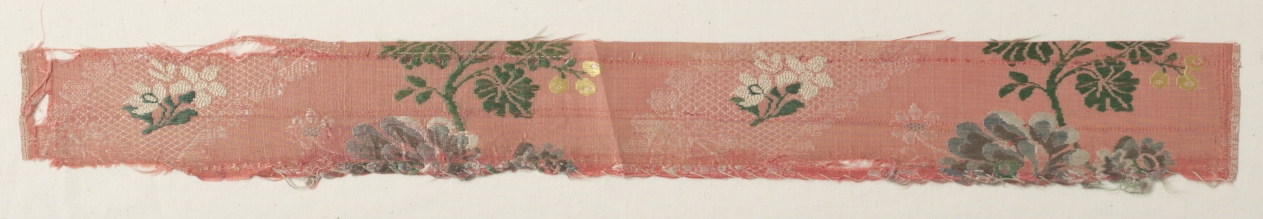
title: Length of Textile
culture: France, 18th century, Period of Louis XV (1723-1774)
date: 1723–1774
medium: brocade, silk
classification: Textile